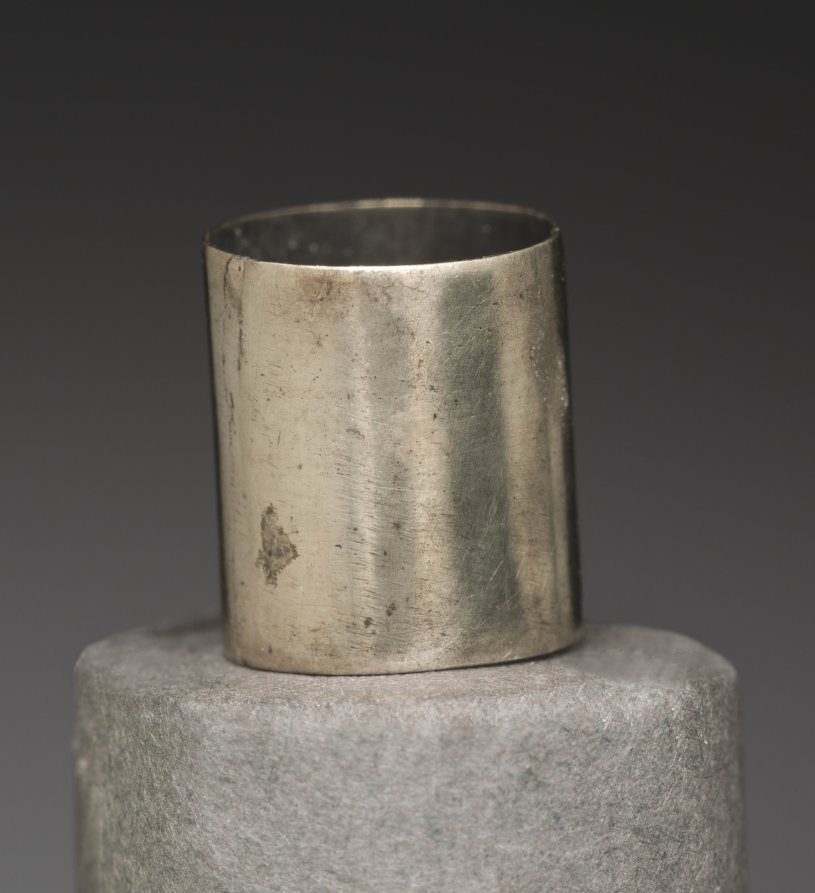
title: Element of Wig Decoration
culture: Egypt, Middle Kingdom (2040–1648 BCE), Dynasty 12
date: 1980–1801 BCE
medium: silver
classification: Jewelry